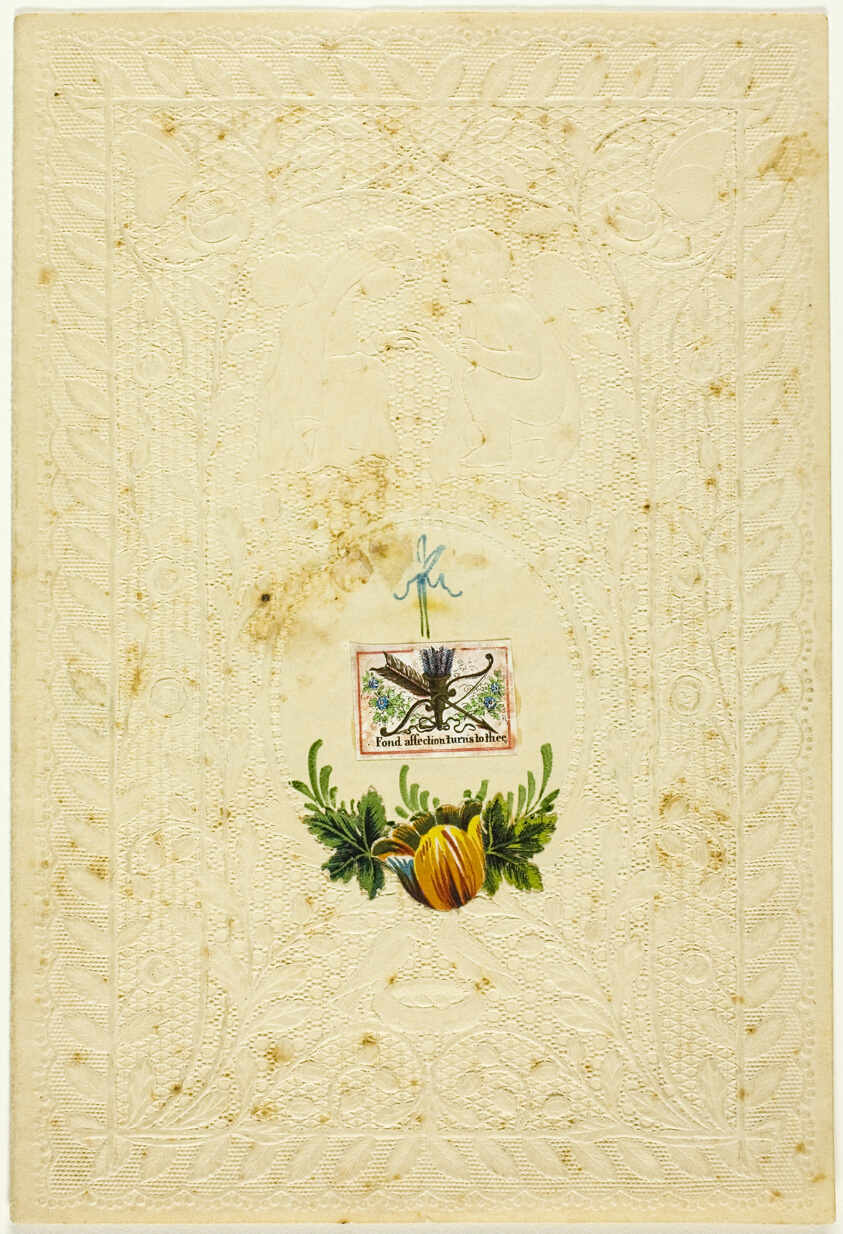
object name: Drawing and Watercolor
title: Fond Affection Turns to Thee (valentine)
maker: Unknown Artist; American or English, 19th century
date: 1840/49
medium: Collaged elements with watercolor on embossed ivory wove paper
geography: United States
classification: collage; valentine; prints and drawing; paper